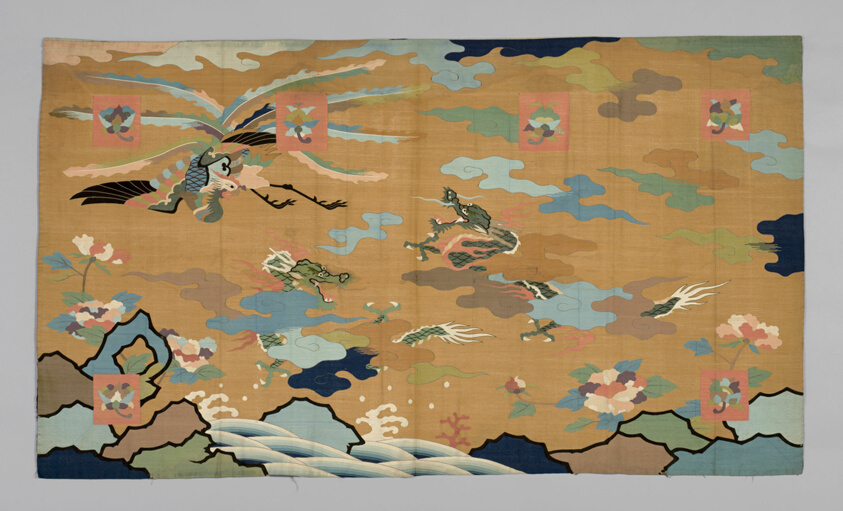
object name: Textile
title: Kesa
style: Japanism, asian, late edo, edo (japanese period)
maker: Japan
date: Edo period (1615–1868), Late 18th century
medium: Silk, gilt-paper-strip-wrapped silk, and peacock-feather-wrapped silk; tapestry weave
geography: Japan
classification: textile; weaving; costume; liturgical - buddhist